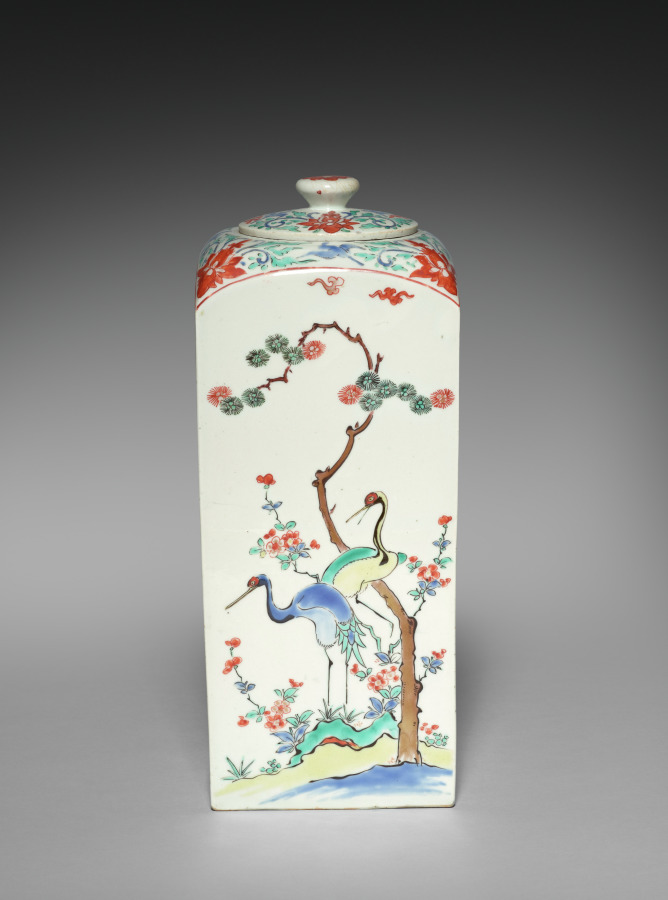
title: Square Jar with Birds and Flowers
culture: Japan, Edo period (1615–1868)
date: late 1600s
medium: Porcelain with overglaze color enamels and gold (Hizen ware, Kakiemon type)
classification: Ceramic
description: This lidded square jar was likely paired with a complementary yet nonidentical mate. The pine tree, plum, and bamboo together form the frequently depicted motif known as the Three Friends of Winter (shōchikubai), so named because of their hardy perseverance in the cold. Each side also features a pair of birds, including cranes on one face and pheasants on another.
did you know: A jar like this was fired at a high temperature, painted with colored enamels, and then fired again at a lower temperature.